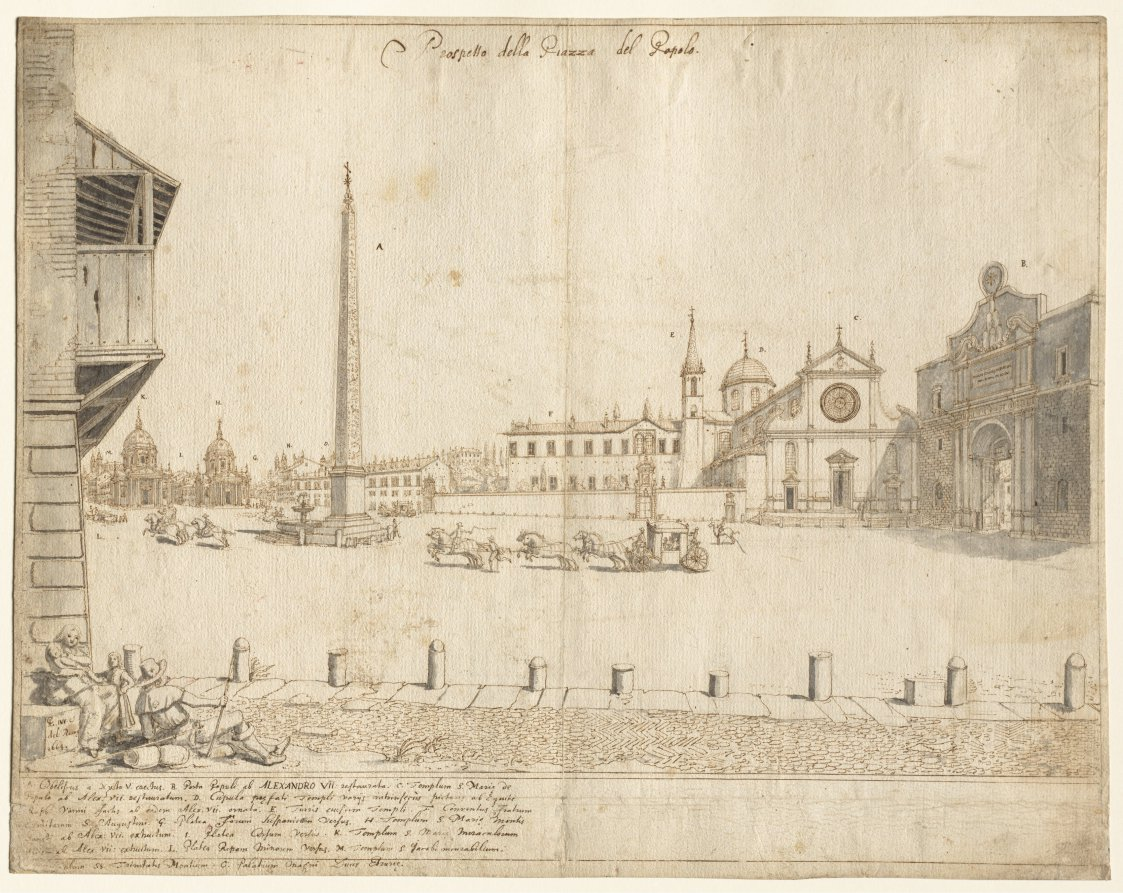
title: Eighteen Views of Rome: The Piazza del Popolo (recto)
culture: Flanders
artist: Lievin Cruyl (Flemish, c. 1640-c. 1720)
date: 1664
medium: pen and brown ink and brush and gray wash over stylus and graphite; framing lines in brown ink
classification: Drawing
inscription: signed, lower left, in brown ink: [artist monogram: CL]. INV. et / del: Romæ / 1664. ; by artist, upper center, in brown ink: Prospetto della Piazza del Popolo. ; by artist, throughout composition, in brown ink: [the letters A-O] ; by artist, lower left, in brown ink: A. Obeliscus a Xysto V. erectus. B. Porta Populi ab ALEXANDRO VÎÎ: restaurata. C. Templum S. Maria de / Populo ab Alex. vii. restauratum. D. Cupula praefati Templi varijs intrinsecùs picturis ab Equite / Raph: Vanni factis ab eodem Alex. vii. ornata. E.Turris eiusdem Templi. F. Conventus Fratrum / Eremitarum S. Augustini. G. Platea Forum hispanicum Versus. H. Templum S. Mariæ Montis / Sancti ab Alex: vii. extructum. I. Platea Cursum Versus. K. Templum S. Mariæ Miraculorum / [illegible]dem ab Alex. vii: extructum. L. Platea Ripam Minorem Versus. M. Templum S. Jacobi incurabilium. / [N. Tem]plum SS. Trinitatis Montium. O. Palatium Magni Ducis Etruriæ. ; lower center, in graphite: L[illegible] ; lower right, in graphite: 2